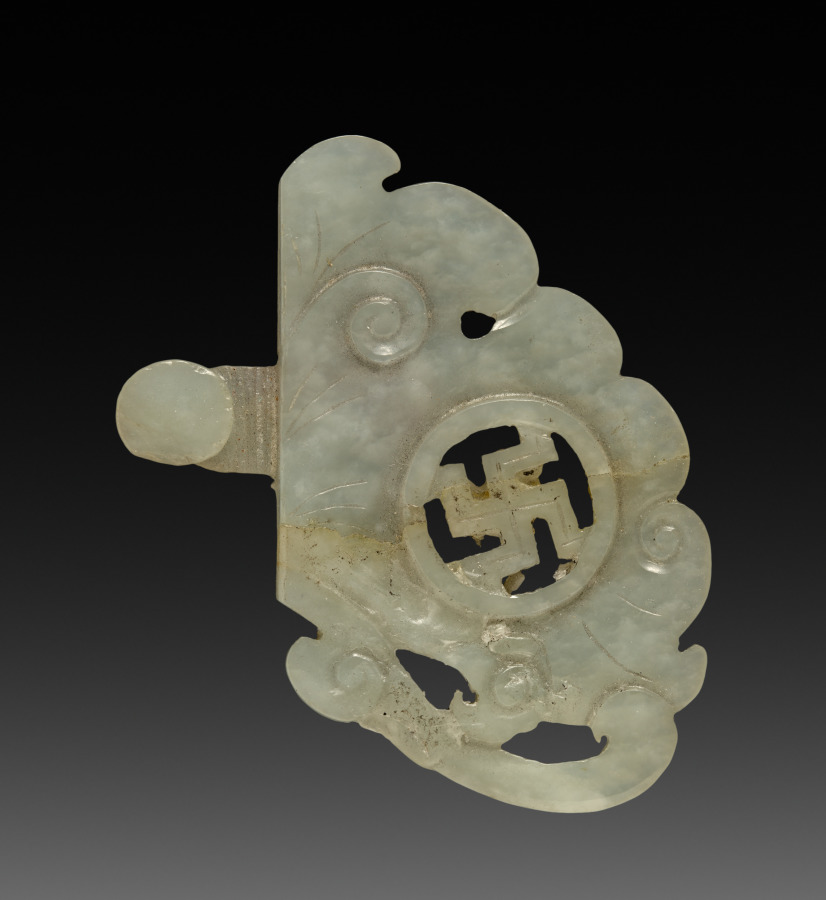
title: Part of Buckle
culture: China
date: 1800s–1900s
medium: white jade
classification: Jewelry